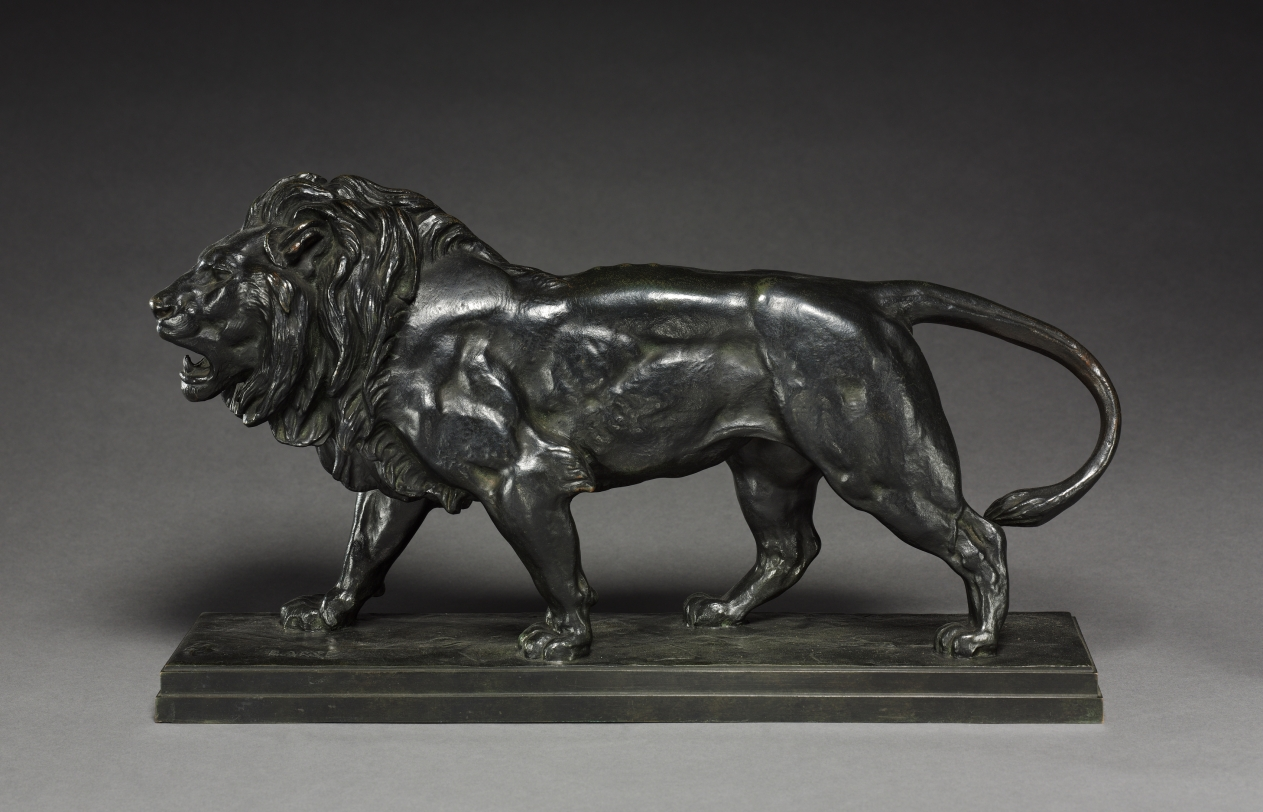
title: Walking Lion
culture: France, 19th century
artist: Antoine-Louis Barye (French, 1796–1875)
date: after 1836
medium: bronze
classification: Sculpture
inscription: Written on base: "Barye"